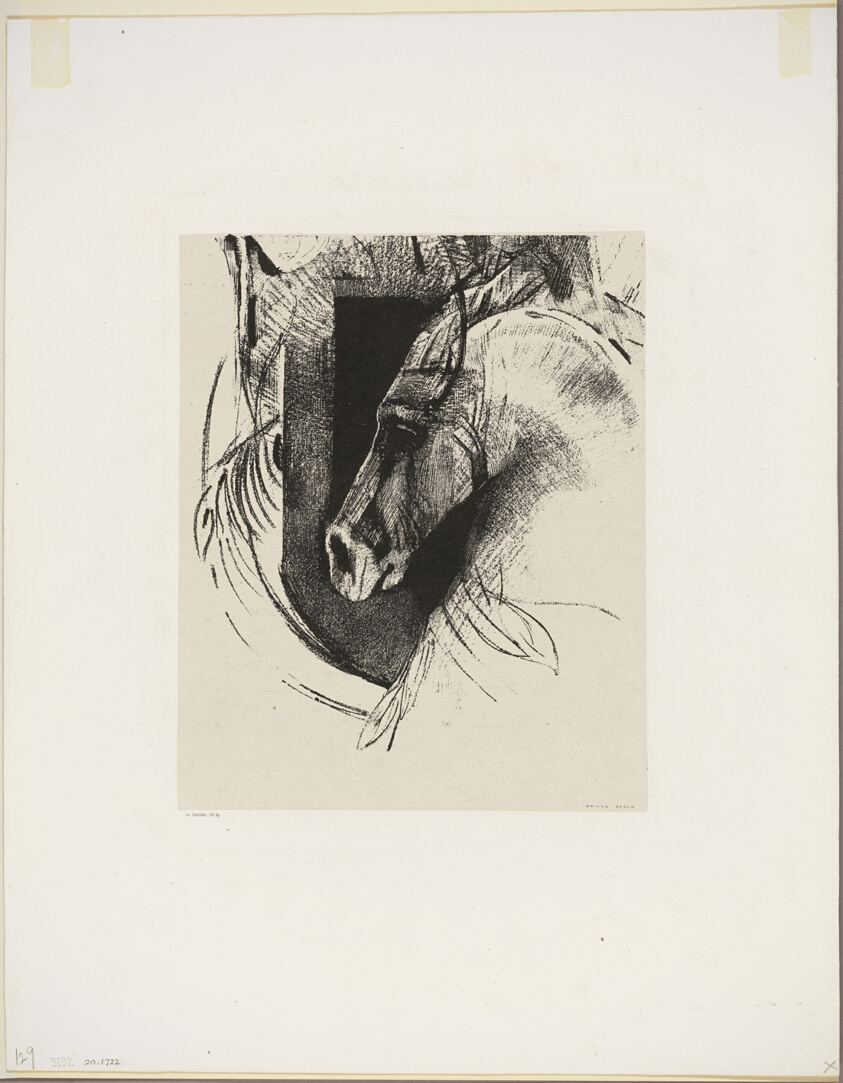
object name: Print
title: The Charger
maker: Odilon Redon (French, 1840-1916)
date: 1894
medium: Lithograph in black on cream China paper laid down on ivory wove paper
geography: France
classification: lithograph; print; prints and drawing; paper